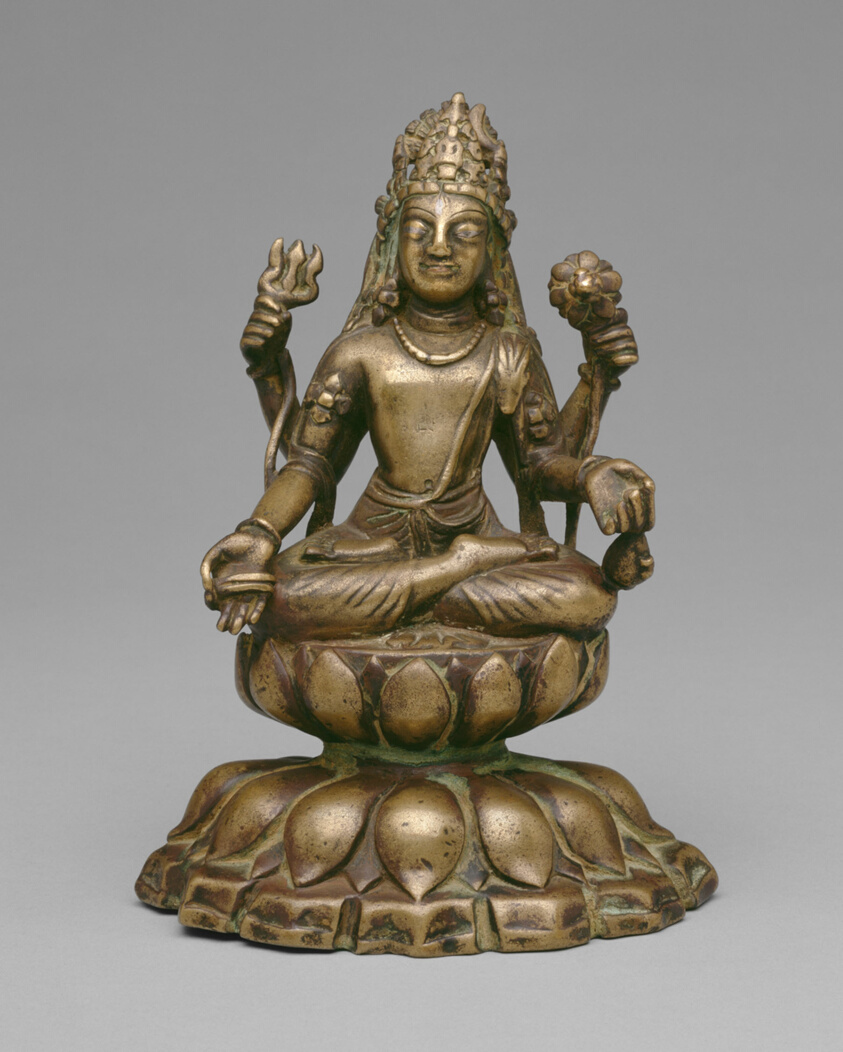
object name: Sculpture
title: Four-Armed Bodhisattva Avalokiteshvara Seated in Lotus Position (Padmasana)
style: South Asian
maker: Pakistan; Khyber Pakhtunkhwa Province, Swat Valley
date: 8th/9th century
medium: Brass inlaid with silver and copper alloy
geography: Pakistan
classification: sculpture; brass; metal; asian art